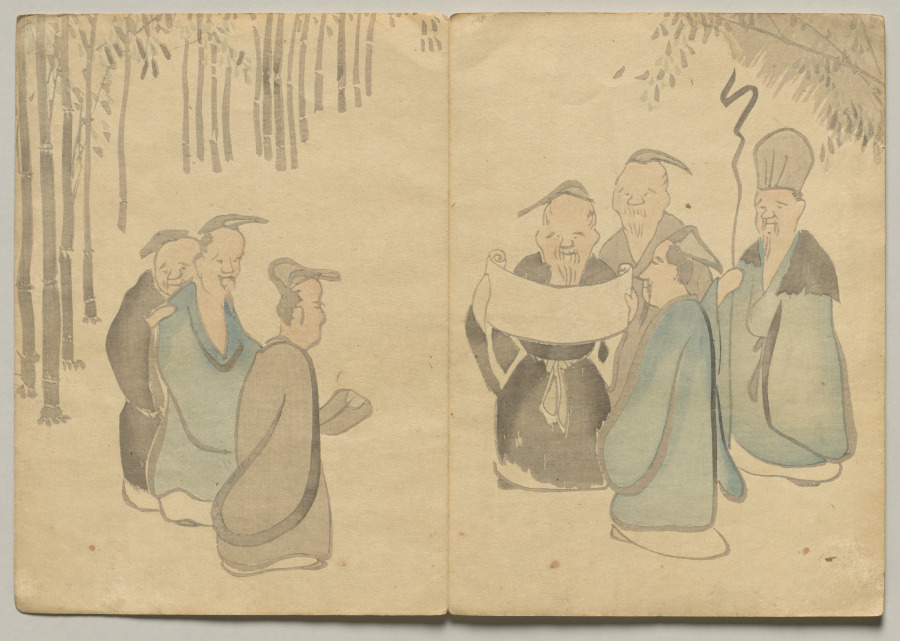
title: Scene from The Kōrin Picture Book (Volume 2)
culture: Japan, Edo period (1615–1868)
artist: Nakamura Hōchū (Japanese, d. 1819)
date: 1800s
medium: color woodblock printed book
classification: Bound Volume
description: Ogata Korin (1658-1716) was one of the most admired artists of Rimpa, or "decorative school painting." These books by the charming later-generation Rimpa artist Hochu record Korin's inventive designs.